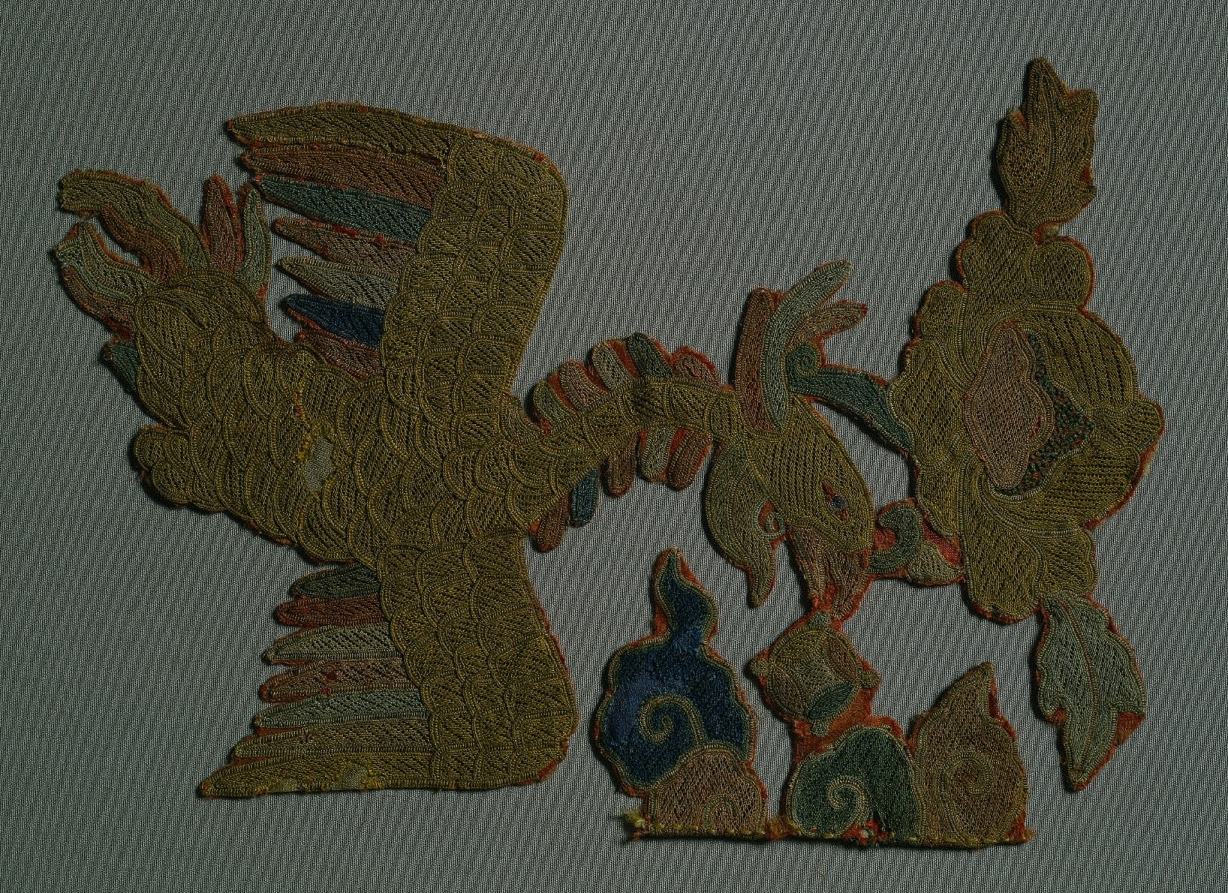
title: Phoenix and Tree Peony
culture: China, Yuan dynasty (1271-1368) - Ming dynasty (1368-1644)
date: 1300s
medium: Silk and silver thread: needle-loop embroidery, silvered paper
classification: Embroidery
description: This needle-loop embroidery is distinguished by its exceptionally fine execution. Few other examples incorporate the variety of intricate diaper patterns seen here. Like most needle-loop embroideries, the phoenix is fragmentary. Rows of loops worked over pieces of gilded or silvered paper make needle-loop embroidery quite heavy. On the other hand, the ground fabrics upon which they were executed were usually lightweight silks. Unable to support the embroidery, they simply wore out over time.